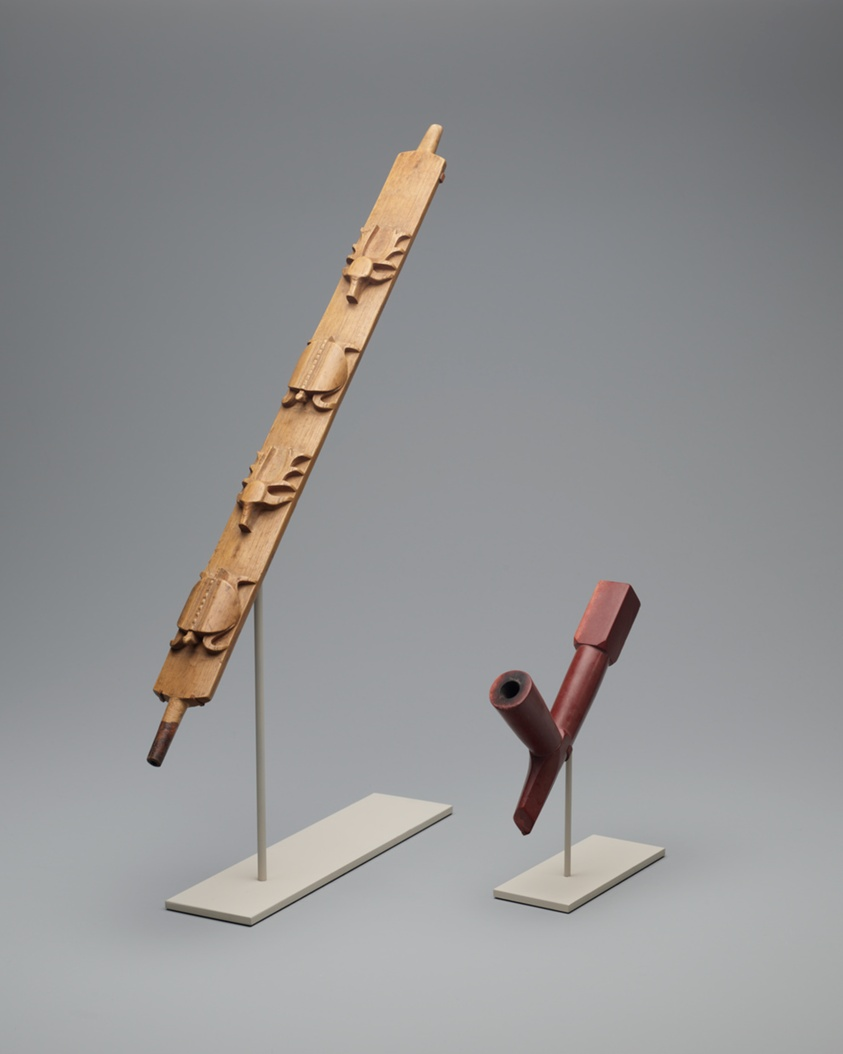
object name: Religious/Ritual Object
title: Pipe Bowl and Effigy Stem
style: cheyenne, plains indian, native american, americas, native north american, Arts of the Americas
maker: Artist unknown (Southern Cheyenne, Tsistsistas); Central or Northern Plains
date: 1880–90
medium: Wood and catlinite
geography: Central Plains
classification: pipe; art of the americas; ritual objects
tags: deer, pipe, stem, turtle